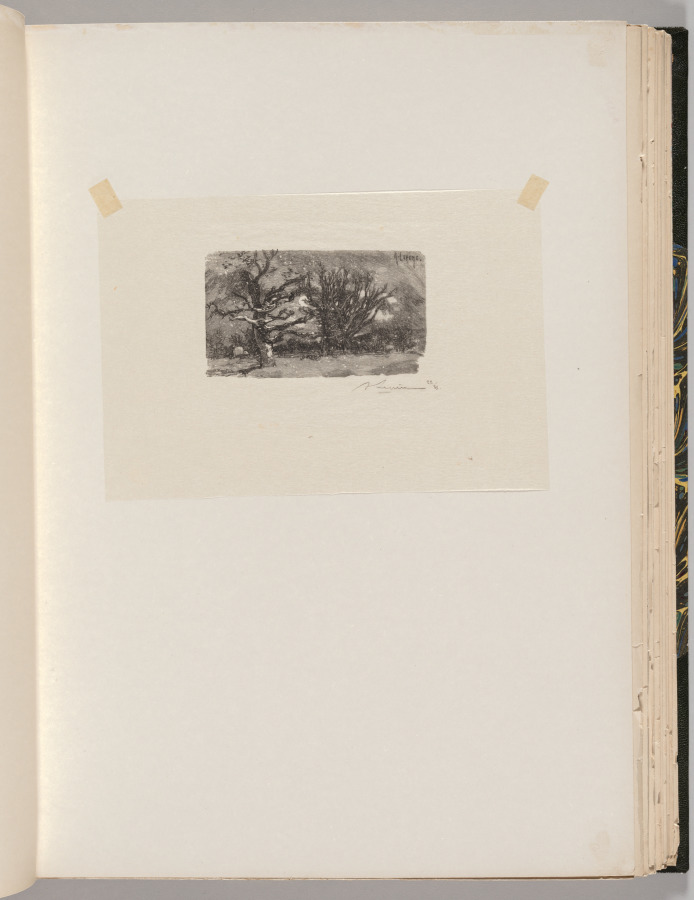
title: Fontainebleau Forest: Au dormoir de Lantara (La Forêt de Fontainebleau: Au dormoir de Lantara)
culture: France, 19th century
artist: Auguste Louis Lepère (French, 1849–1918)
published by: A. Desmoulins, Published in Revue Illustrée, 1887–90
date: 1890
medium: wood engraving from bound volume of 34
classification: Bound Volume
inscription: In block, upper right: A. LEPÈRE; below image, lower right, in black ink: ALepère 22/35; on window mat, lower right, in graphite: Au dormoir de Lantara